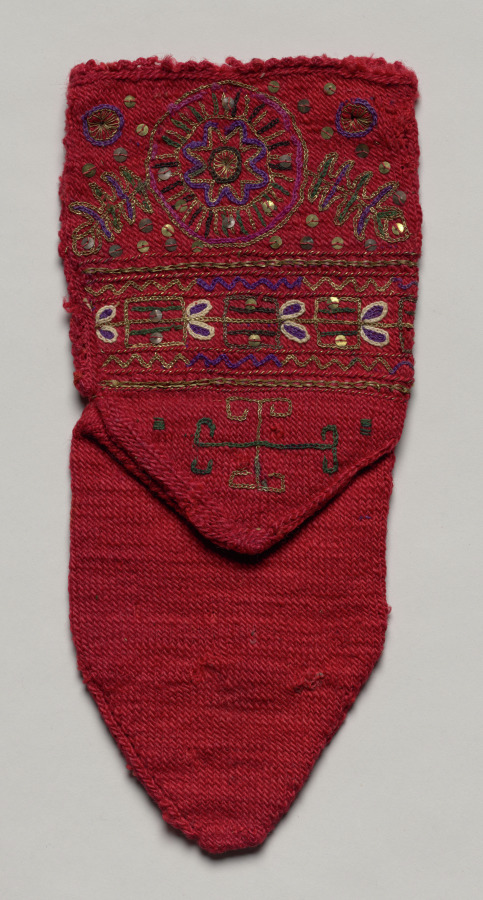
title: Woman's Bridal Socks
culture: Yugoslavia, Serbia, 20th century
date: early 1900s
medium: embroidered wool, gold thread, sequins, knitting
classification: Knitting